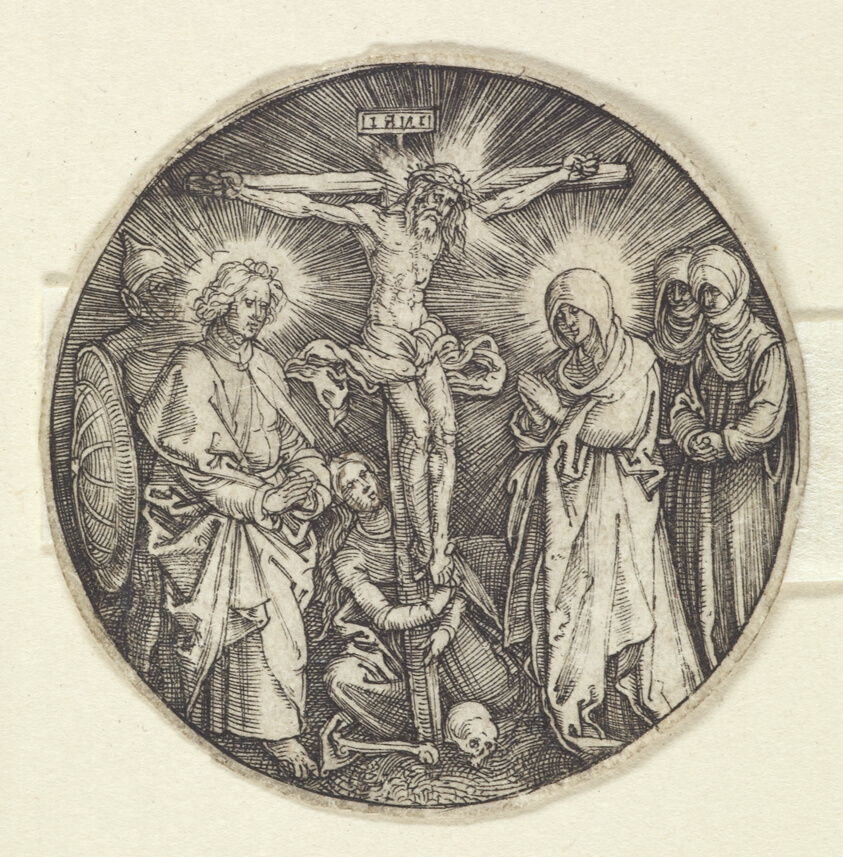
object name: Print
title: The Small Crucifixion ("The Pommel of Emperor Maximilian")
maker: Albrecht Dürer (German, 1471-1528)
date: 1519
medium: Engraving in black on ivory laid paper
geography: Germany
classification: engraving; print; prints and drawing; paper